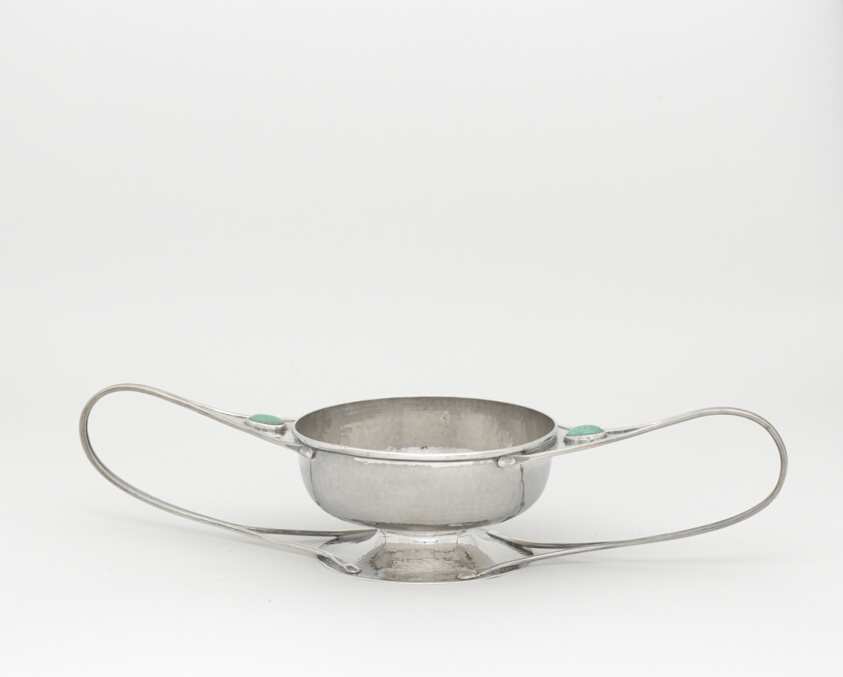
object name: Metalwork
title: Two-Handled Dish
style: Arts and Crafts Movement, American Arts and Crafts Movement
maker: Shreve, Crump and Low (American, founded 1869); Boston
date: 1902–7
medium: Silver and turquoise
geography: Boston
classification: dish (vessel); silver; american decorative arts; american arts; decorative arts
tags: dining, drinking